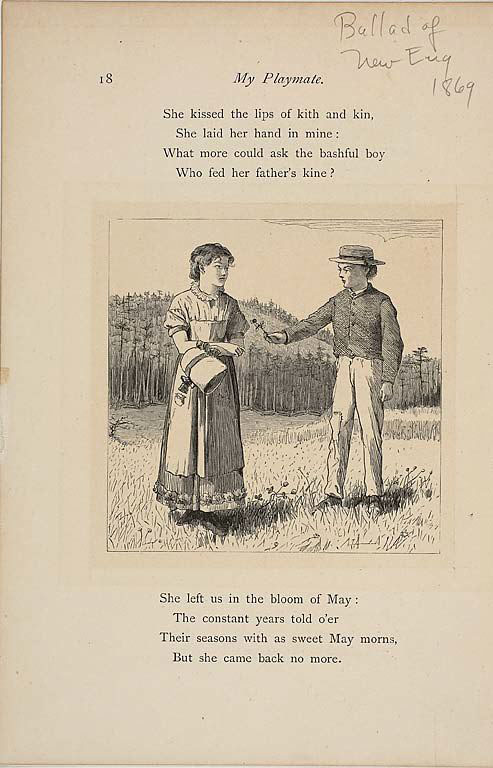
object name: Print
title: The Playmates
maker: Winslow Homer (American, 1836-1910); published by Our Young Folks (American, 1865-1873)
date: published November 1869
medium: Wood engraving on paper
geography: United States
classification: wood engraving; print; prints and drawing